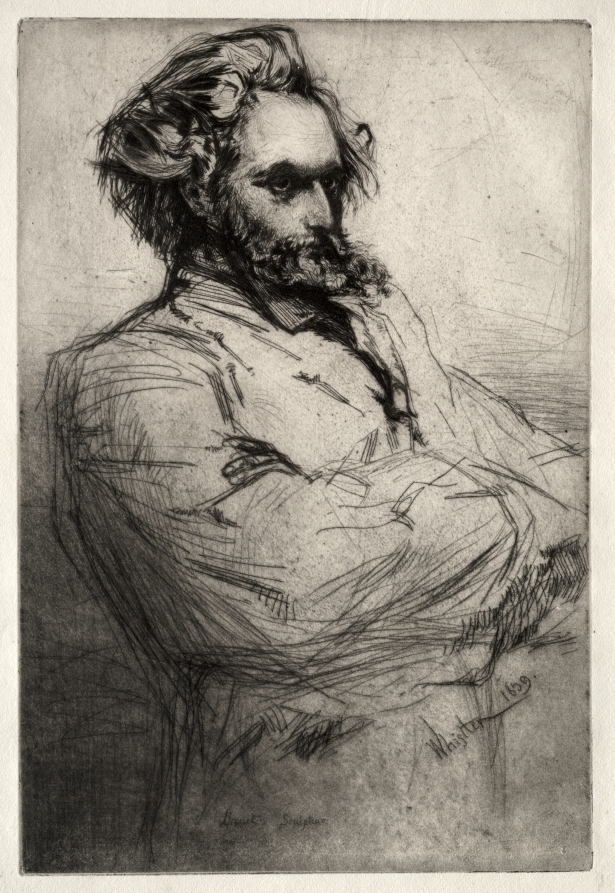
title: Drouet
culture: America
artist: James McNeill Whistler (American, 1834–1903)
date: 1859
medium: etching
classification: Print